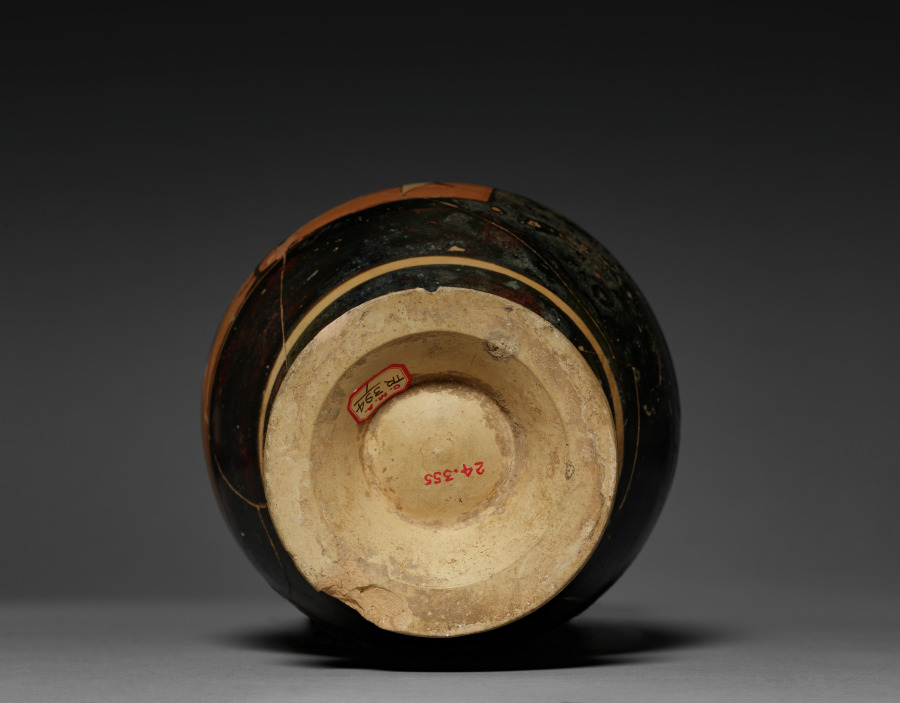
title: Black-Figure Olpe (Wine Jug): Rooster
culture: Greek, Middle/Late Corinthian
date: c. 575 BCE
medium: ceramic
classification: Ceramic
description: Although this wine jug, simply decorated with a rooster and two lotus blossoms, looks much like Athenian vases, it was made in Corinth. The paler buff color of the Corinthian clay can be seen on the handle and in some areas of loss, but the background of the decorated area has been covered with a red slip imitating the reddish, iron-rich Attic (or Athenian) clay. On the back of the vase, two reserved (red) crescent shapes may represent eyes, like those painted in much more detail on many drinking cups of this period.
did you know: Roosters appear frequently on vases—alone, in cock fights, and as love gifts.